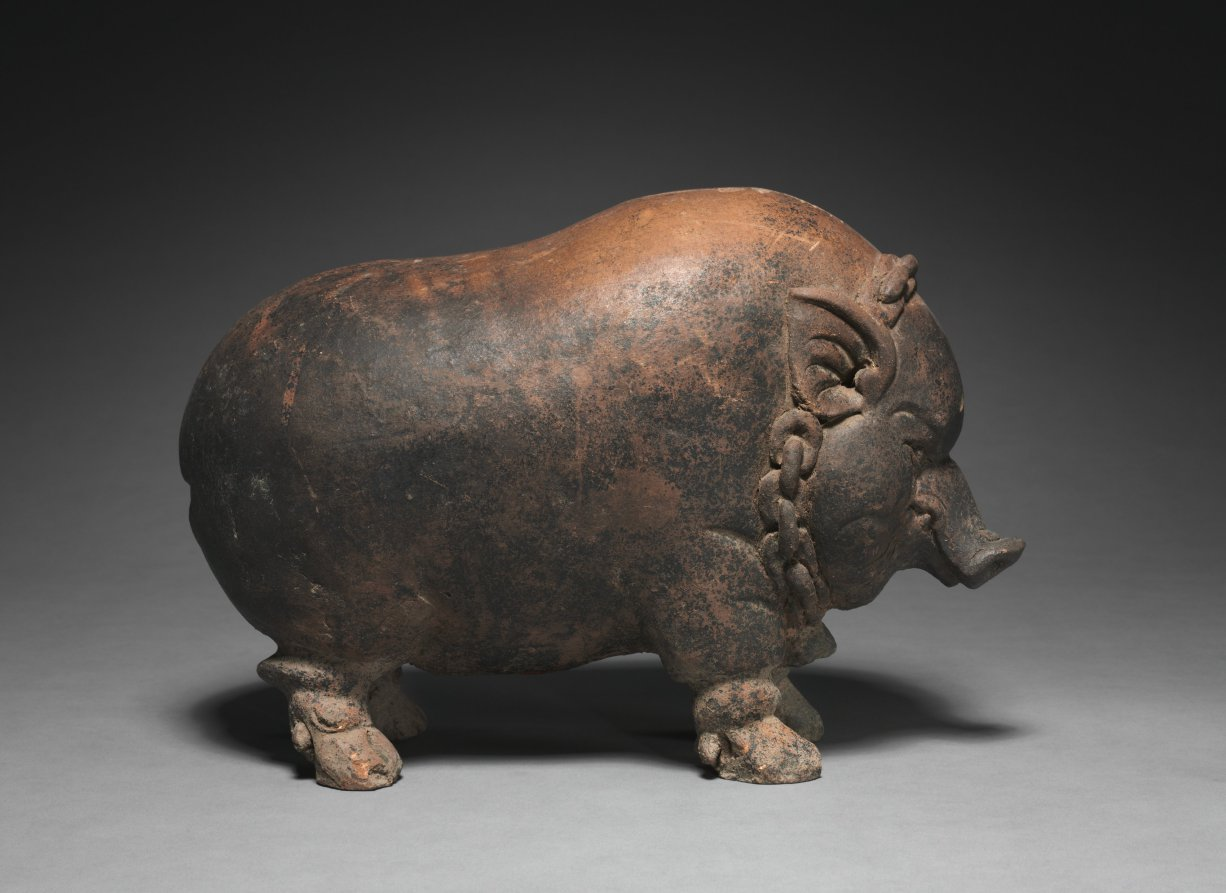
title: Piggy Bank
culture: Java, Majapahit Dynasty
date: 1300s–1400s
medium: terracotta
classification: Sculpture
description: Do I look familiar to you? My round and exaggerated form makes me perfect for storing precious coins, which could be inserted through the slot (now closed) on the hump of my back. My fierce expression is a warning to scare off any burglars, and the padlock and chain around my neck indicate my function as a personal bank. Yes, I am a piggy bank—a lucky one that has survived intact for over 500 years! Usually we end up broken by people who want our coins.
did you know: The word for piggy bank in Eastern Java is tjèlèngan, meaning ‘wild boar.’